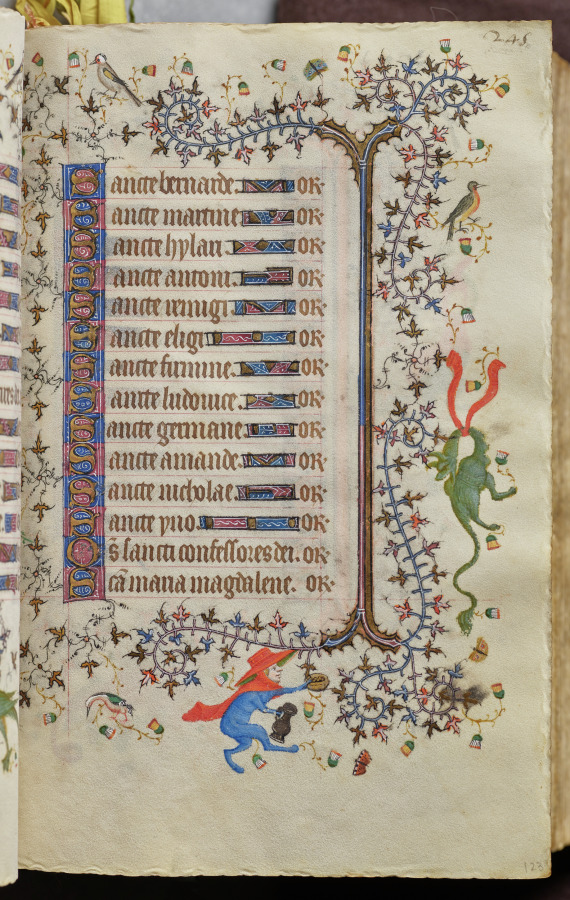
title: Hours of Charles the Noble, King of Navarre (1361-1425): fol. 123r, Text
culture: France, Paris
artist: Master of the Brussels Initials and Associates (French)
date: c. 1405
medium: ink, tempera, and gold on vellum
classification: Bound Volume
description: This precious volume was obviously highly prized by its owner, the French-born King of Navarre, who had his coat of arms painted on no less than twenty folios. Rather than directly commissioning this manuscript from a specific workshop, it seems that Charles the Noble acquired his book of hours -- perhaps ready-made for the luxury market -- while on a trip to Paris in 1404-05. A collaborative effort, six painting styles are evidenced within the pages of this codex, those of two Italians, two Frenchmen, and two Netherlanders. The painter who was responsible for the planning and decoration of the book, and who produced seventeen of the large miniatures, was a Bolognese artist known as the Master of the Brussels Initials. His principal assistant, responsible for most of the borders, was a Florentine who signed his name "Zecho" da Firenze on folio 208 verso.